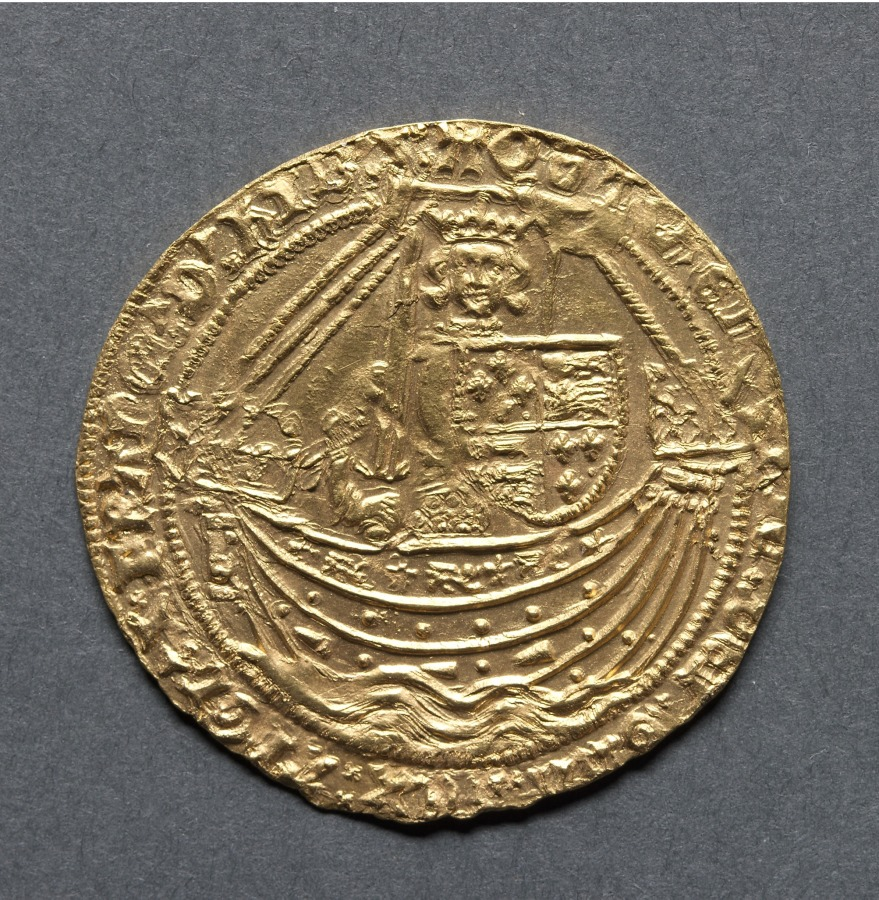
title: Noble: Henry V in Ship with Shield of Arms (obverse); Ornamental Cross with Lis Terminals (reverse)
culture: England, Henry V, 1413-1422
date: 1413–22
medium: gold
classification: Coins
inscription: HENRIC DI GRA REX ANGL X FRANC D HIB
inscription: IHC AUTEM TRANSIENS PER MEDIUM ILLORR IBAT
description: For a considerable time it was impossible to determine which coins belonged to the last part of the reign of Henry IV and which to the first part of the reign of Henry V. However the finding of a hoard of coins in 1929, which contained 63 nobles, resulted in a more correct classification. The importance of finding buried hoards of coins is important to their study. The classification of this coin as class B refers to the type of lettering and markings. There are seven such groups of these coins.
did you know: Henry V's coins are very similar to those of his father; there are seven different varieties of design and style of lettering.